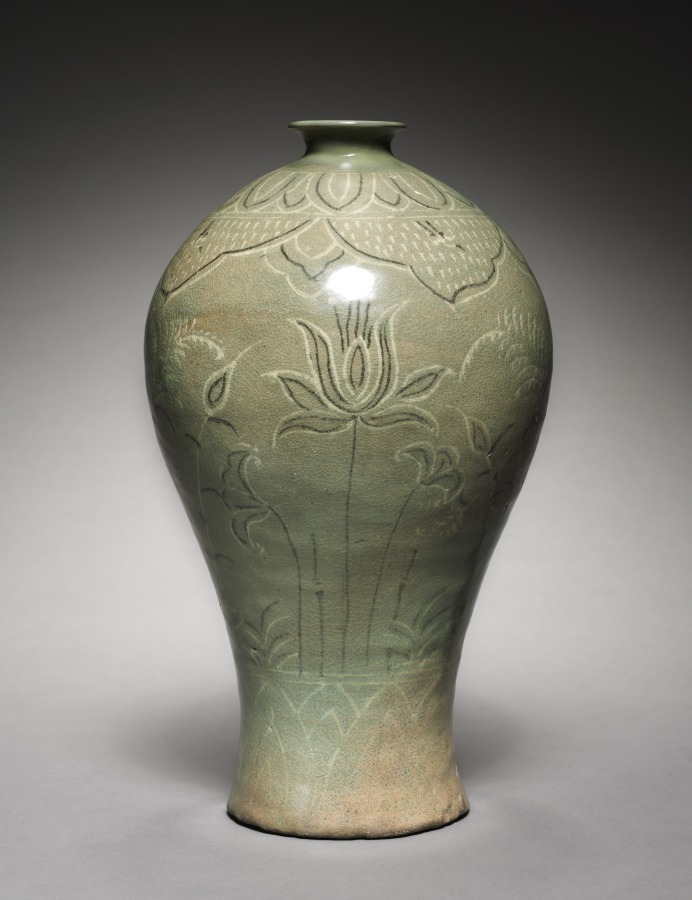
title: Prunus Vase with Inlaid Lotus and Reed Design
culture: Korea, Goryeo dynasty (918–1392)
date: 1300s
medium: Celadon ware with inlaid white and black slip decoration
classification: Ceramic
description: As early as the seventh century, the practice of drinking tea and wine became an important part of elite culture in Korea. Once used to store alcoholic beverages, this type of vase features a wide body followed by a sharply rounded shoulder, a short neck and a small opening. Most of the remaining examples no longer have a lid, but originally it may have had a lid that not only covers the opening, but also served as a cup.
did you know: Prunus vases are often believed to contain a branch of plum blossoms, but recent research reveals that these lidded vases were also used to contain cooking liquid such as sesame oil.